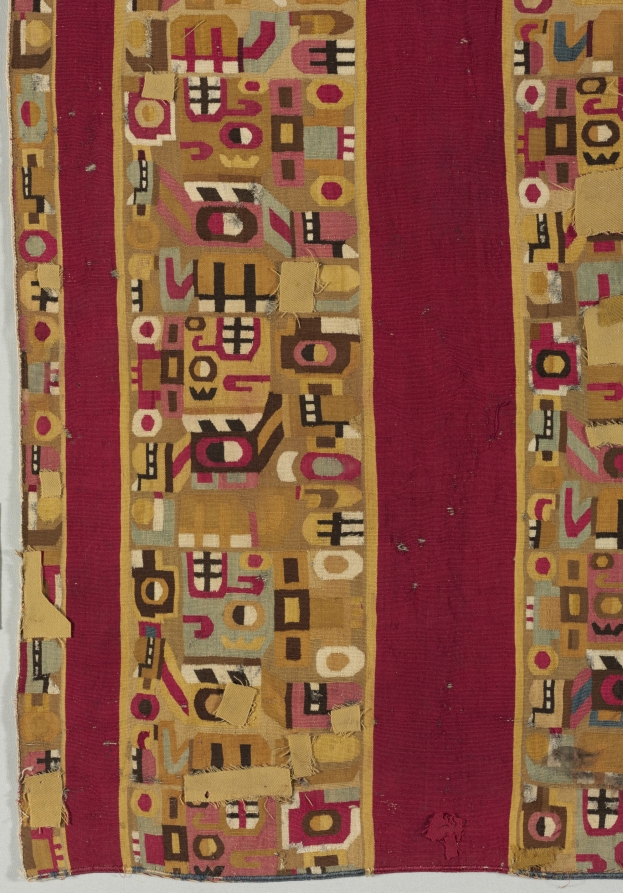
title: Tunic with Sacrificer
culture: South America, Peru, Central Andes, Middle Horizon, Wari people, 7th-11th century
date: 600–1000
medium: camelid-fiber, cotton; tapestry weave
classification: Textile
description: An extremely abstract supernatural sacrifice repeats in different colors and orientations across the body of this tunic, which was shortened on one side in antiquity. Look for the toothy black-and-white mouth in the sacrificer's upward-gazing head; other facial features include a button nose and a vertically divided eye. The figure holds the L-shaped haft of an axe behind its back and, at the front of its body, a short staff with a severed, upside-down human head on the top.